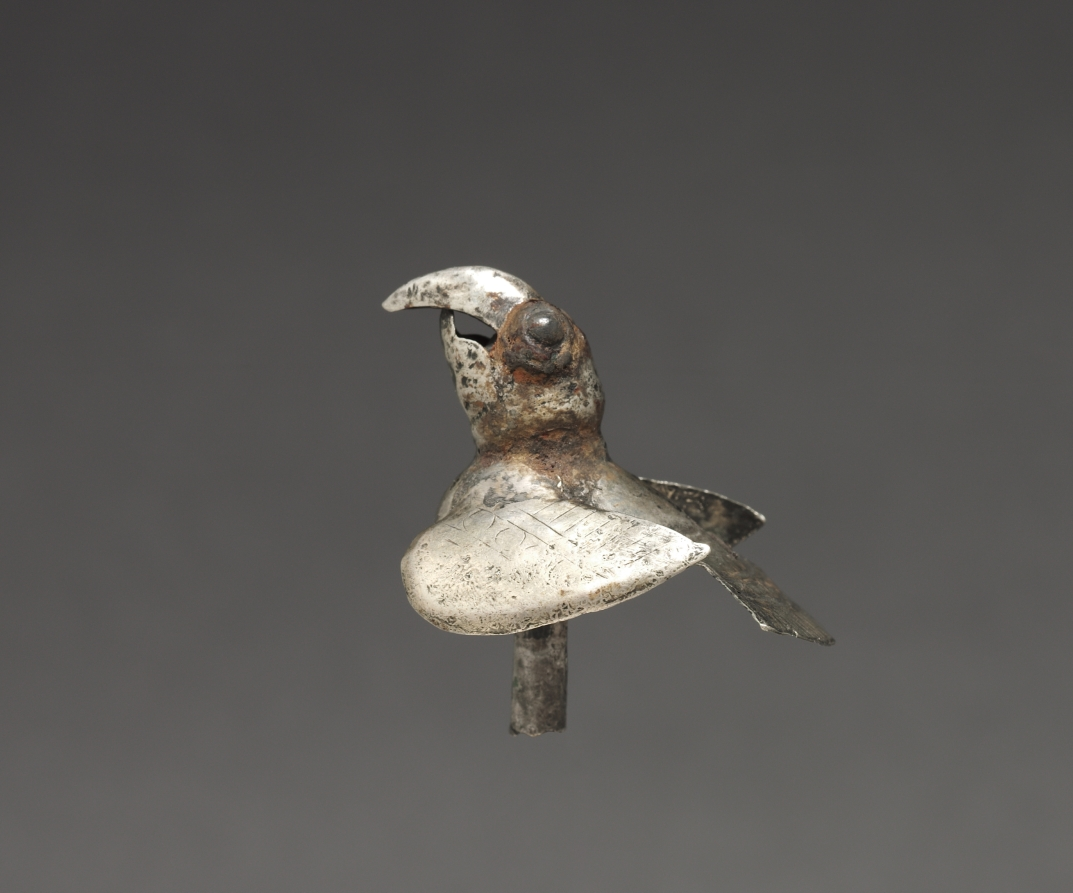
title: Macaw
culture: Peru, North Coast, Sicán or Chimú, 9th-15th Century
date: c. 800–1470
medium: gold alloy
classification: Metalwork